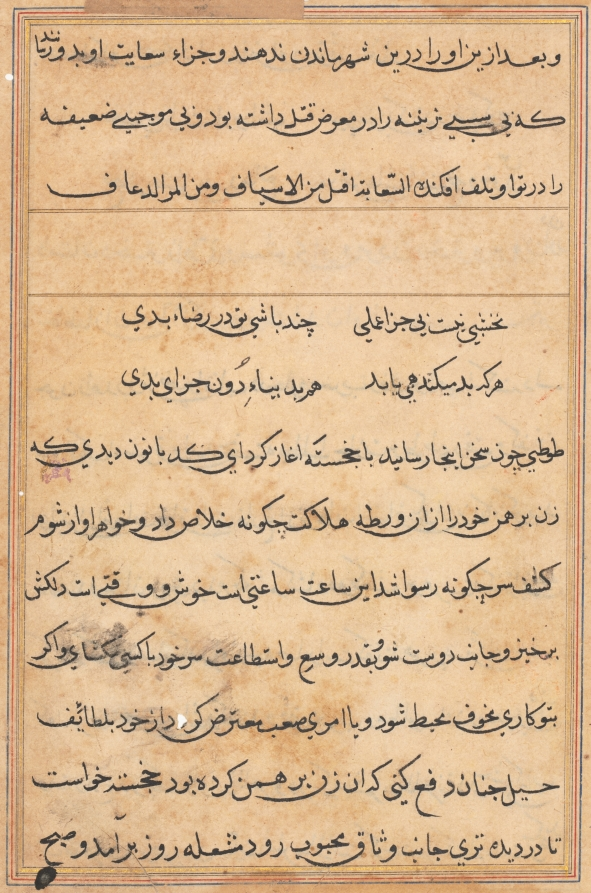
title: Page from Tales of a Parrot (Tuti-nama): text page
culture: Mughal India, court of Akbar (reigned 1556–1605)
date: c. 1560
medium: gum tempera, ink, and gold on paper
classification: Painting